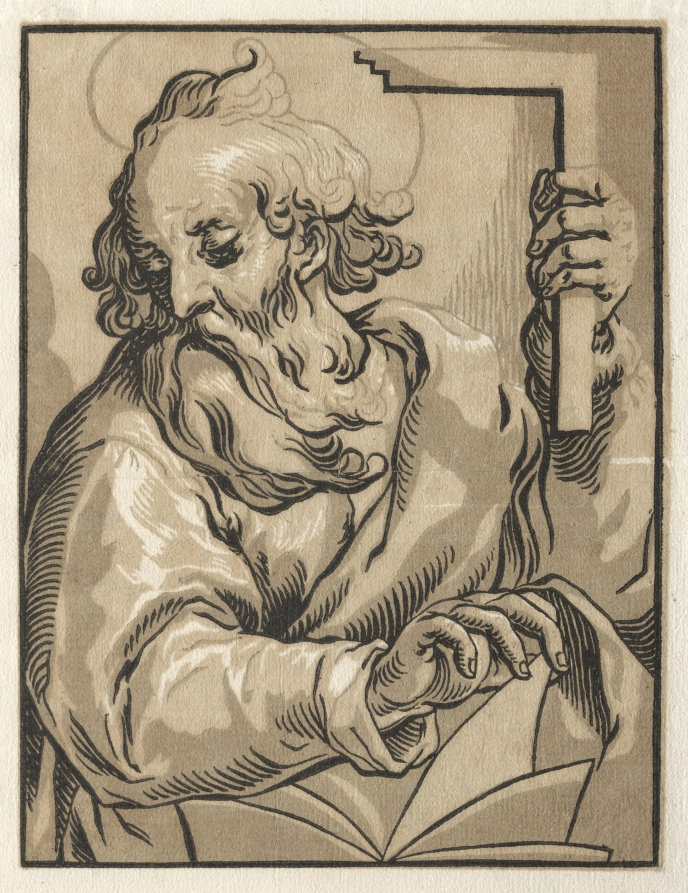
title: Christ and the Apostles: St. Thomas (with the Square)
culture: Germany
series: the Series: Christ and the Apostles, no. 17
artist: Ludolph Büsinck (German, 1590–1669)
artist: after G. Lallemand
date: 1600s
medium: chiaroscuro woodcut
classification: Print